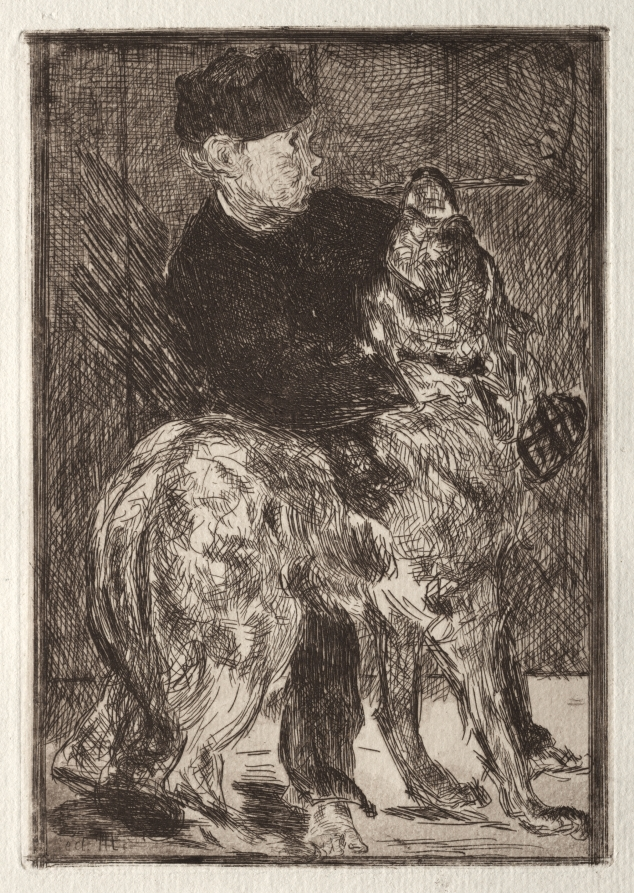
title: The Boy with a Dog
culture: France, 19th century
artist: Édouard Manet (French, 1832–1883)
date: 1861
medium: etching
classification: Print